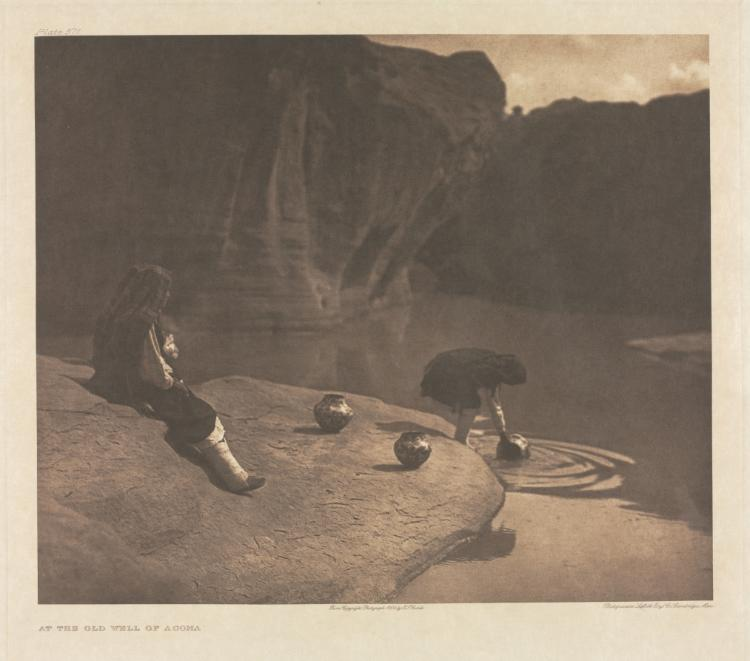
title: Portfolio XVI, Plate 571: At the Old Well of Acoma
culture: America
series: The North American Indian: being a series of Portfolios picturing and describing the Indians of the United States, the Dominion of Canada, and Alaska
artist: Edward S. Curtis (American, 1868–1952)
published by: The University Press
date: 1904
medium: photogravure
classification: Portfolio